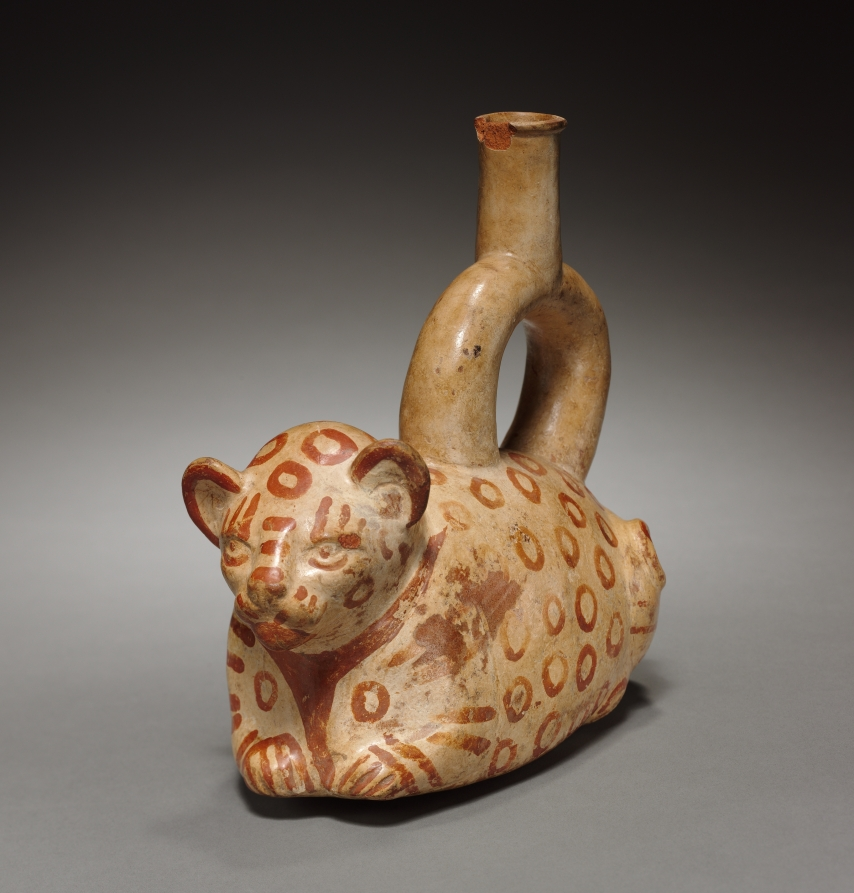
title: Stirrup Spouted Vessel of Feline Form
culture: Peru, Mochica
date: 1–1000 CE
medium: red earthenware decorated with cream-colored slip and brown pigment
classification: Ceramic